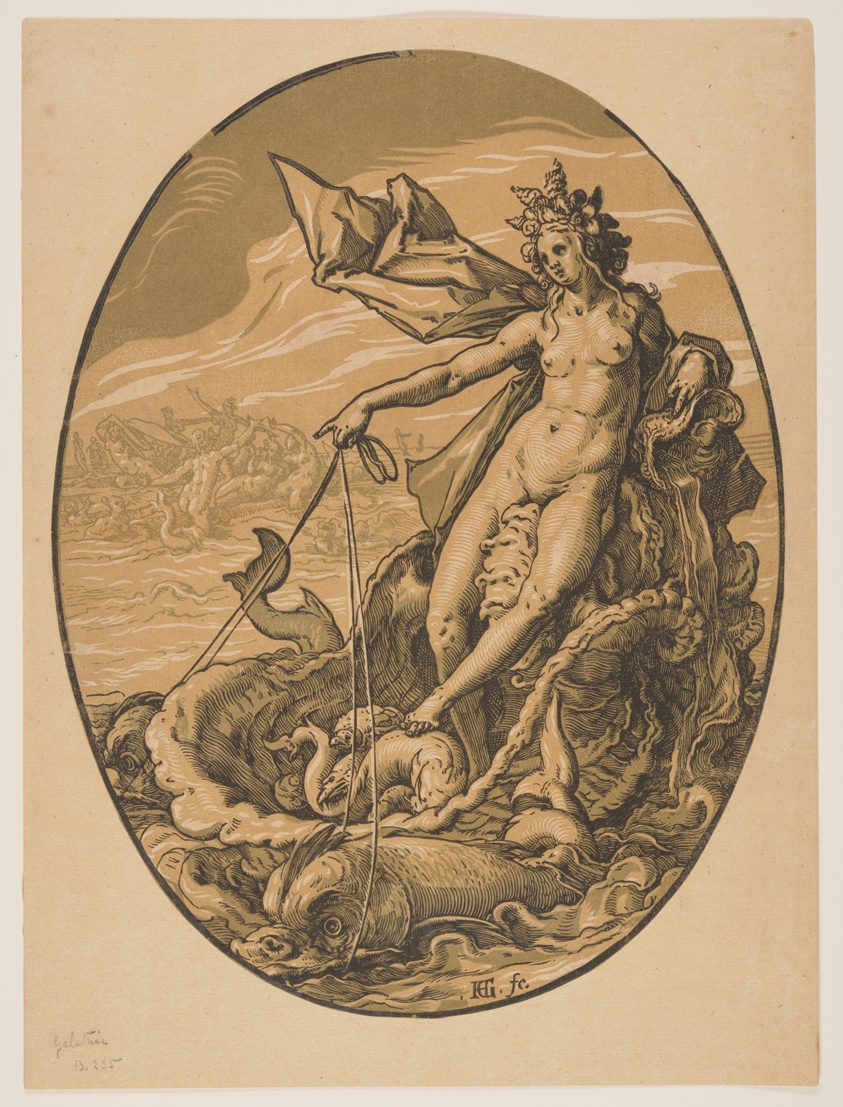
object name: Print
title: Tethys, from The Deities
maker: Hendrick Goltzius (Dutch, 1558–1617)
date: 1588/90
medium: Chiaroscuro woodcut from three blocks in tan and green on ivory laid paper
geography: Netherlands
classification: print; paper; prints and drawing; woodcut